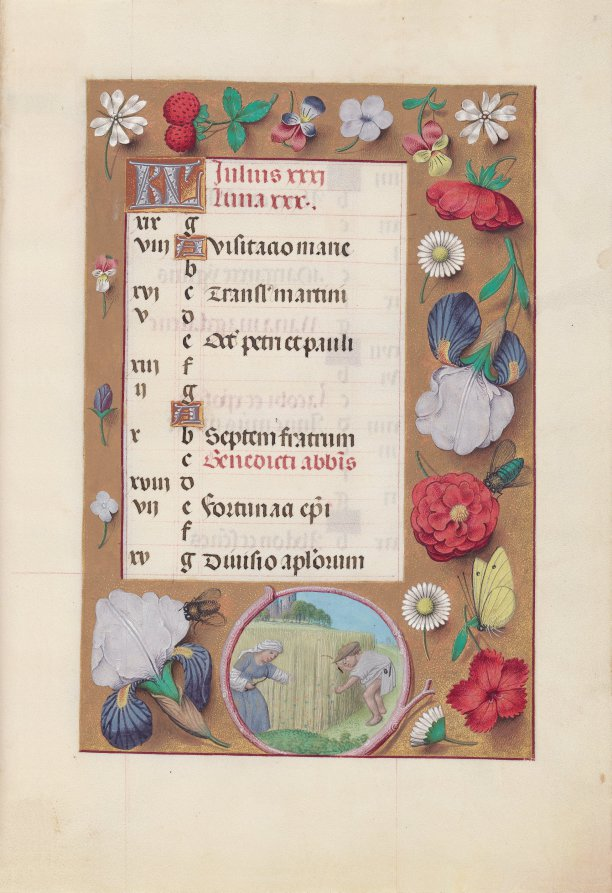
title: Hours of Queen Isabella the Catholic, Queen of Spain: Fol. 8r, July - Harvesting Wheat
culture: Flanders, Ghent and Bruges, late 15th century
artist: Master of the First Prayerbook of Maximillian (Flemish, c. 1444–1519)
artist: and Associates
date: c. 1500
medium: ink, tempera, and gold on vellum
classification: Bound Volume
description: A great lover of Flemish art, Queen Isabella treasured her many devotional books. This deluxe manuscript was created for her private devotions by highly organized and distinctly talented manuscript painters active in Ghent and Bruges. The Ghent-Bruges school represents the culmination of Flemish book painting, whose main features were the use of rich colors, illusionistic effects, a love of landscape, and a strong sense of visual narrative. Manuscripts produced by this circle of artists are renowned for their border decoration featuring a rich variety of realistically painted flowers, scrolling acanthus leaves, birds, and butterflies.